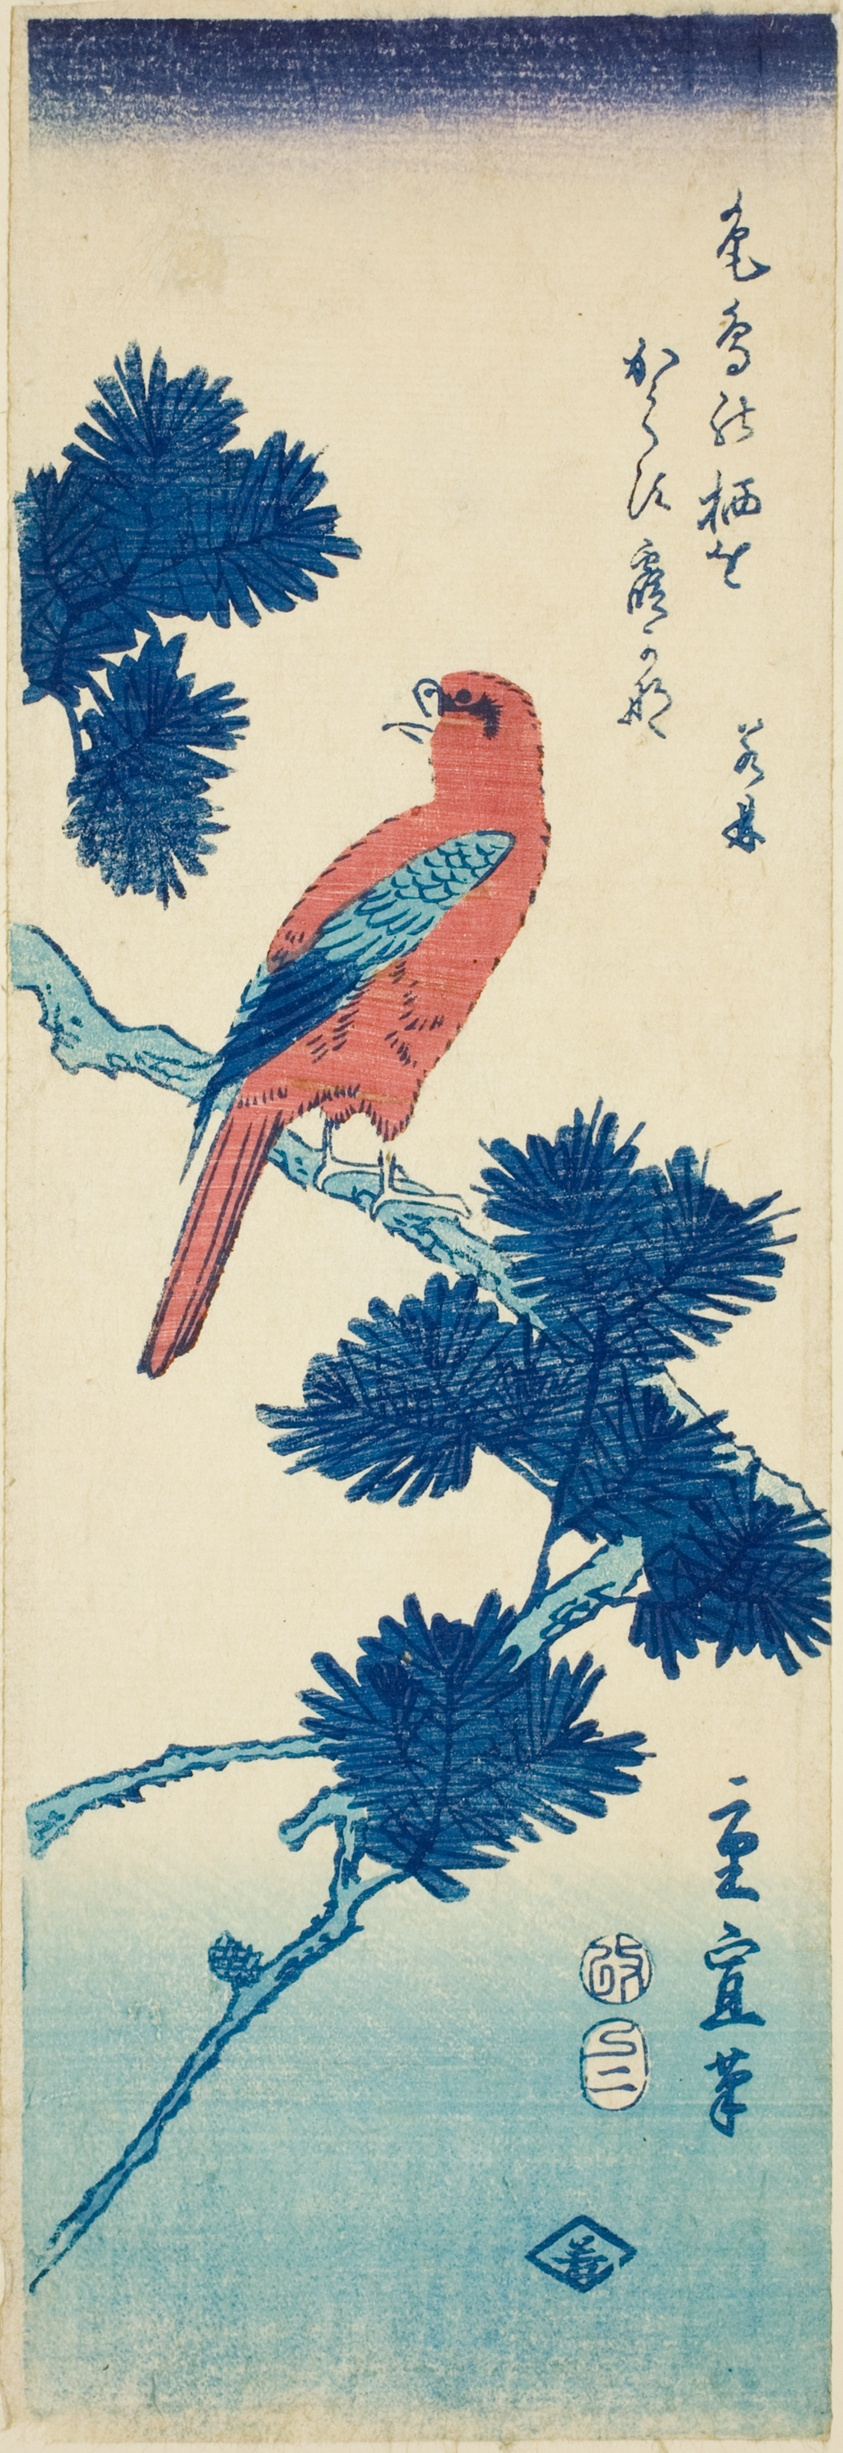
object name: Print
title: Bird on pine tree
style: Japanese (culture or style)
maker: Utagawa Hiroshige II (Shigenobu) (Japanese, 1826–1869)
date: 1857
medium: Color woodblock print; aitanzaku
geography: Japan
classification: woodblock print; print; asian art